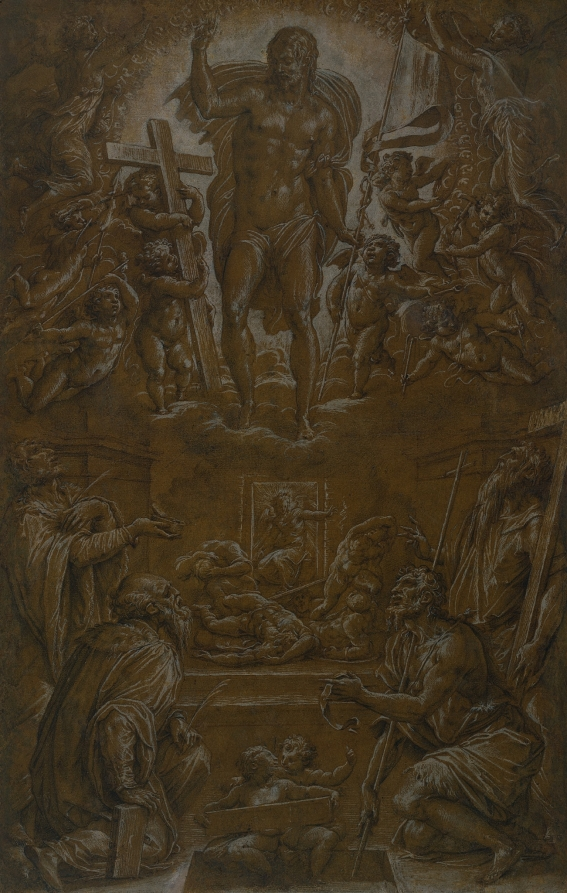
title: The Risen Christ Adored by Saints and Angels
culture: Italy, 16th century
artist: Giorgio Vasari (Italian, 1511–1574)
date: 1566–68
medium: Black chalk, pen and brown ink, and extensive white heightening (wash and point of brush), with incising on paper prepared with a brown wash.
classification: Drawing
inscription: by artist, lower center, in black chalk: [victime] pas[chali]; verso of secondary support, upper right, in brown ink: [illegible] 274; center left, in brown ink: [5?] [illegible]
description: Florentine artist and author Giorgio Vasari venerated Michelangelo as the premier example of artistic genius and emulated the master in much of his work. He made this modello (a finished drawing for presentation to a patron) in preparation for a church altarpiece in Florence. It shows a finely muscled Christ appearing within a host of angels above a group of saints. Vasari’s Christ imitates the pose and body type of Michelangelo’s Christ in the Last Judgment fresco; he altered the pose, while suggesting his knowledge of the earlier composition.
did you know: This highly finished presentation drawing, called a modello, was made by the artist to show to his patron the final plans for a painted altarpiece.